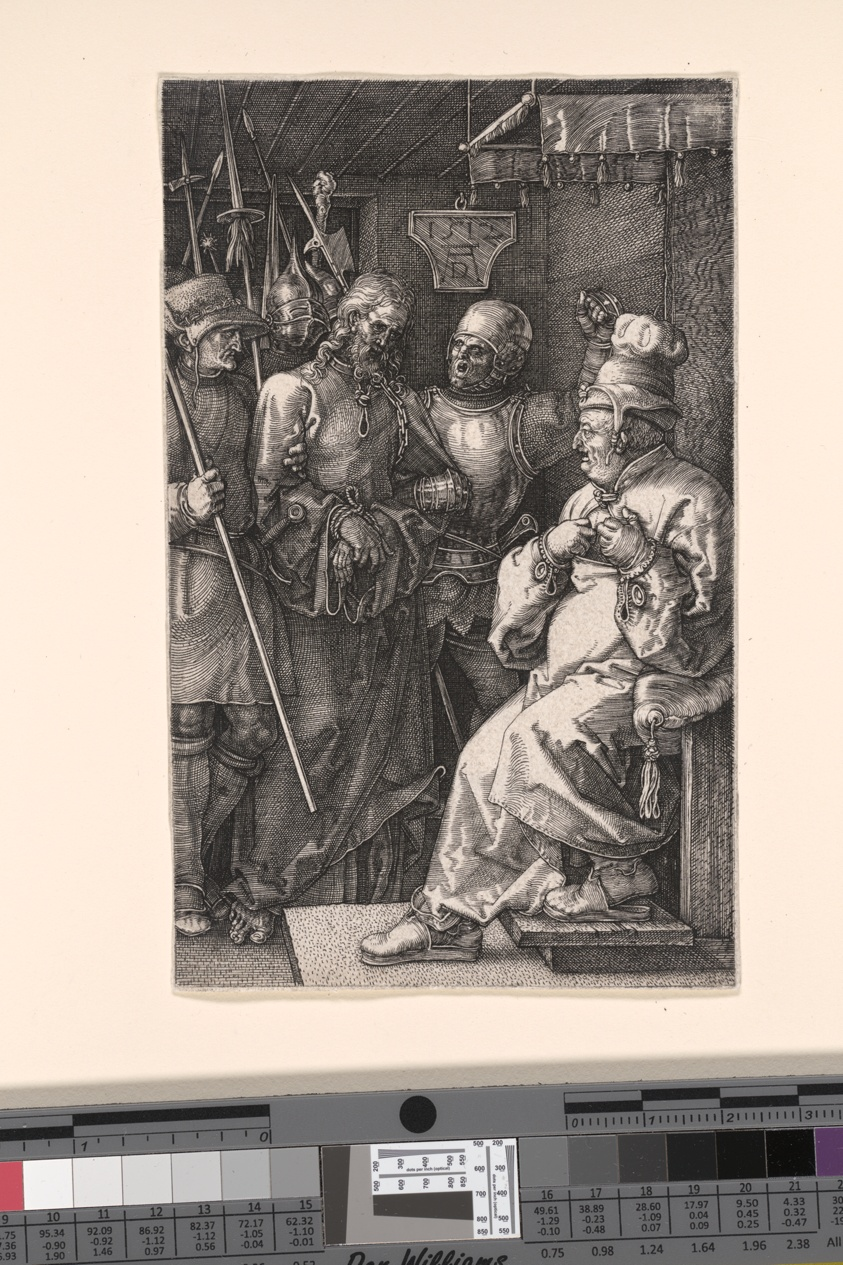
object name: Print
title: Christ before Caiaphas, from The Engraved Passion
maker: Albrecht Dürer (German, 1471–1528)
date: 1512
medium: Engraving on paper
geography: Germany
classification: engraving; paper; print; prints and drawing